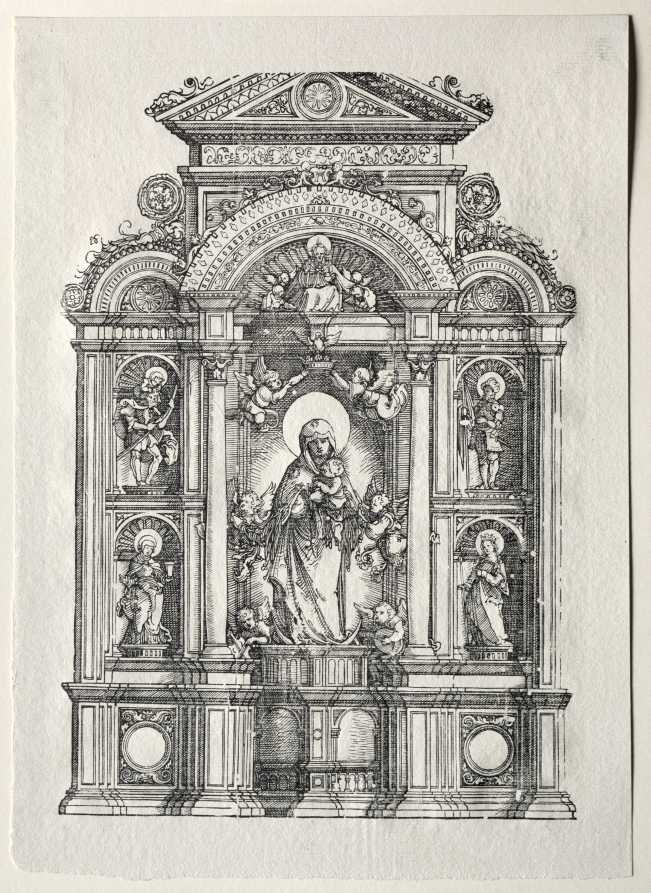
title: Altar mit der Schönen Maria von Regensburg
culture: Germany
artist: Albrecht Altdorfer (German, c. 1480–1538)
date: 1520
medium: woodcut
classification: Print